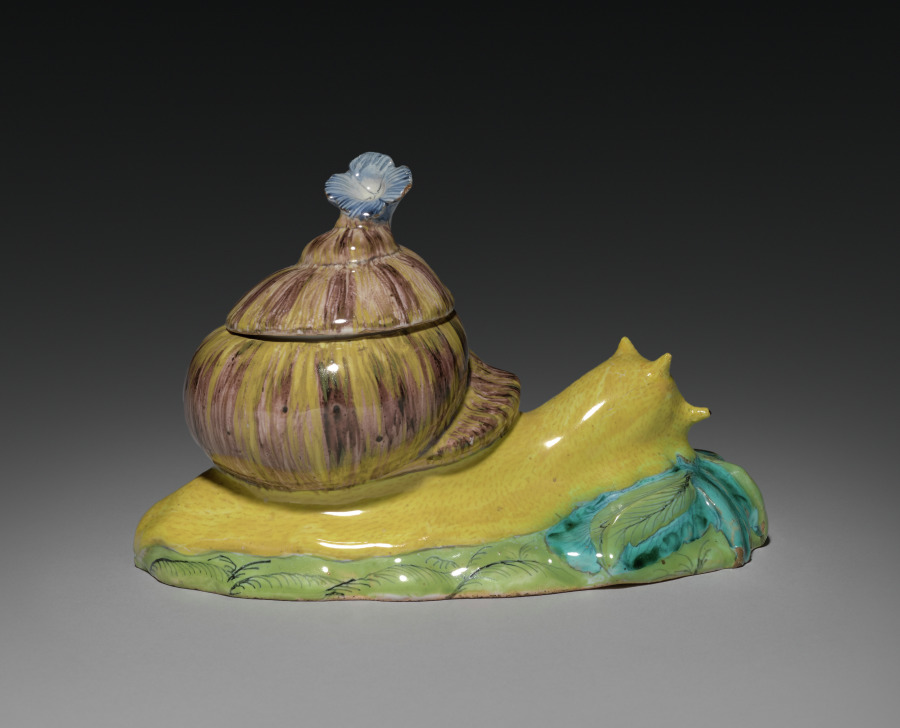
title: Covered Box in the Form of a Snail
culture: France, 18th century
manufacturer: Strasbourg Factory (France)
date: c. 1750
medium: faience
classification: Ceramic